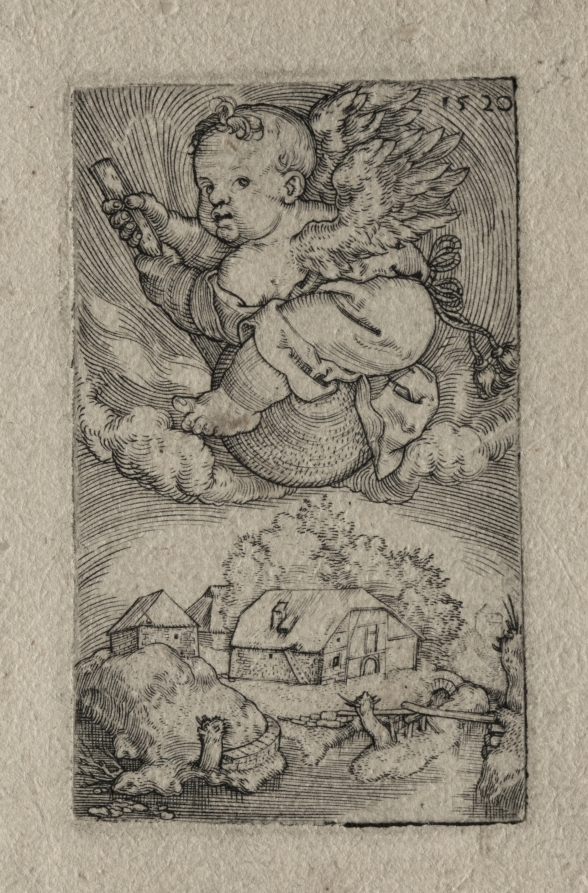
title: Genius Riding on a Ball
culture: Germany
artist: Barthel Beham (German, 1502–1540)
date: 1520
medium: engraving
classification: Print